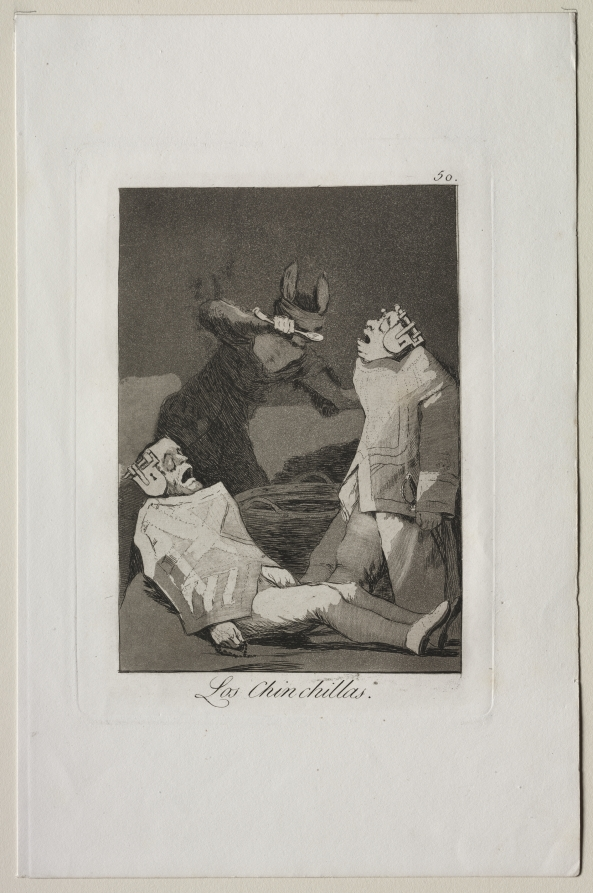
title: The Chinchillas, Plate 50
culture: Spain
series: Los Chinchillas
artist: Francisco de Goya (Spanish, 1746–1828)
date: 1799, printed c. 1855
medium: etching and aquatint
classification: Print